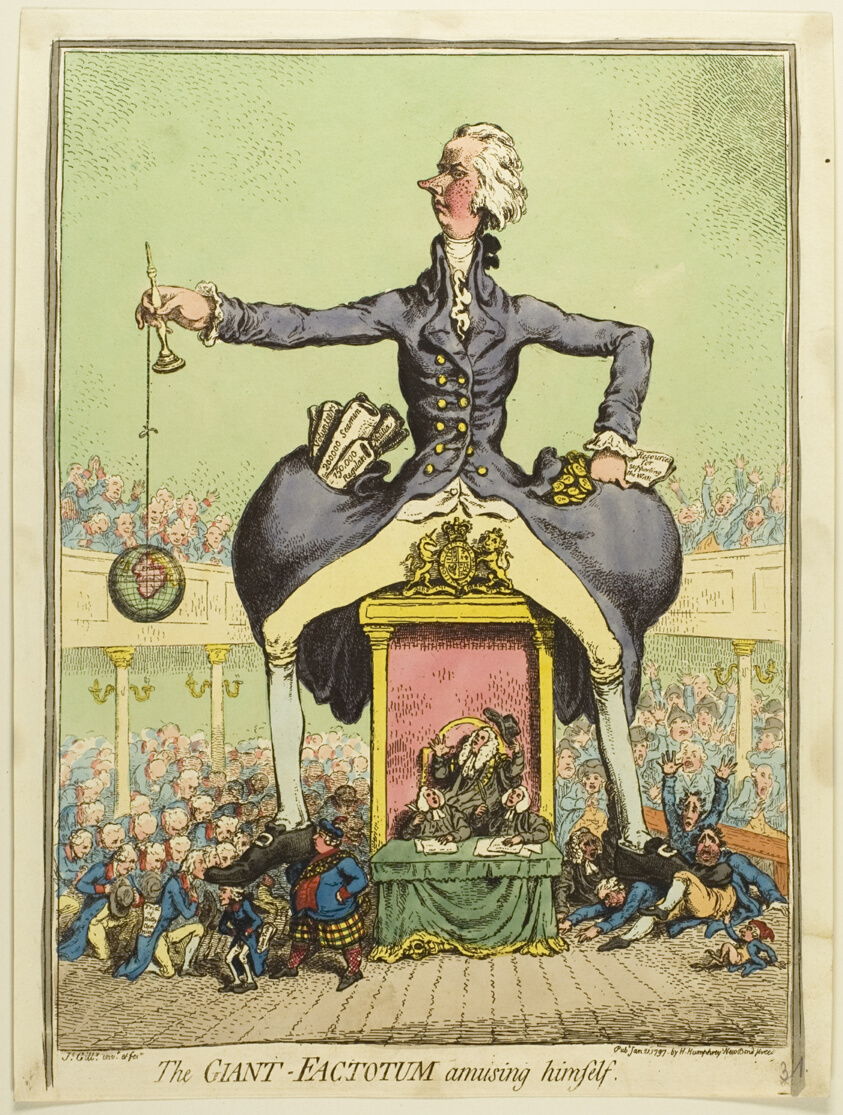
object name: Print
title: The Giant Factotum Amusing Himself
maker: James Gillray (English, 1756-1815); published by Hannah Humphrey (English, c. 1745-1818)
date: published January 21, 1797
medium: Hand-colored etching on paper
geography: England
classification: etching; print; prints and drawing